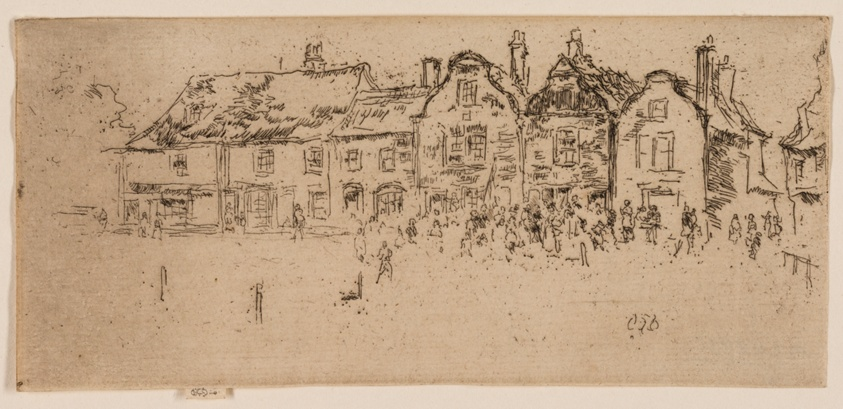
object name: Print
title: Salvation Army, Sandwich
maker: James McNeill Whistler (American, 1834-1903)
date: 1887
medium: Etching and drypoint with foul biting on cream laid paper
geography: United States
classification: etching; drypoint; foul biting; print; prints and drawing; paper